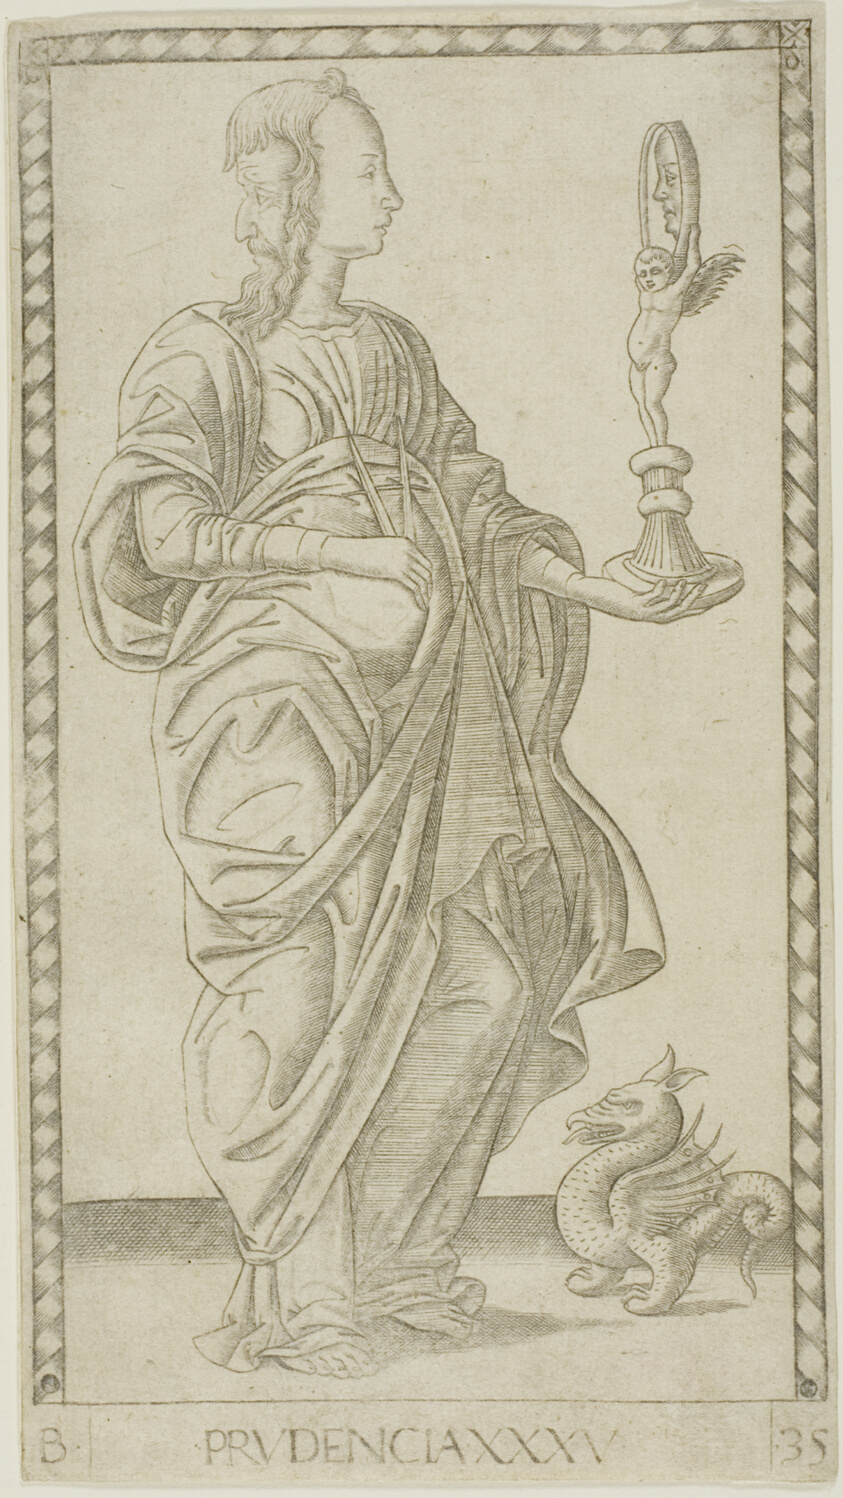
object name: Print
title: Prudence, plate 35 from Genii and Virtues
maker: Master of the E-Series Tarocchi (Italian, active c. 1465)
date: c. 1465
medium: Engraving on paper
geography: Italy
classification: engraving; print; prints and drawing